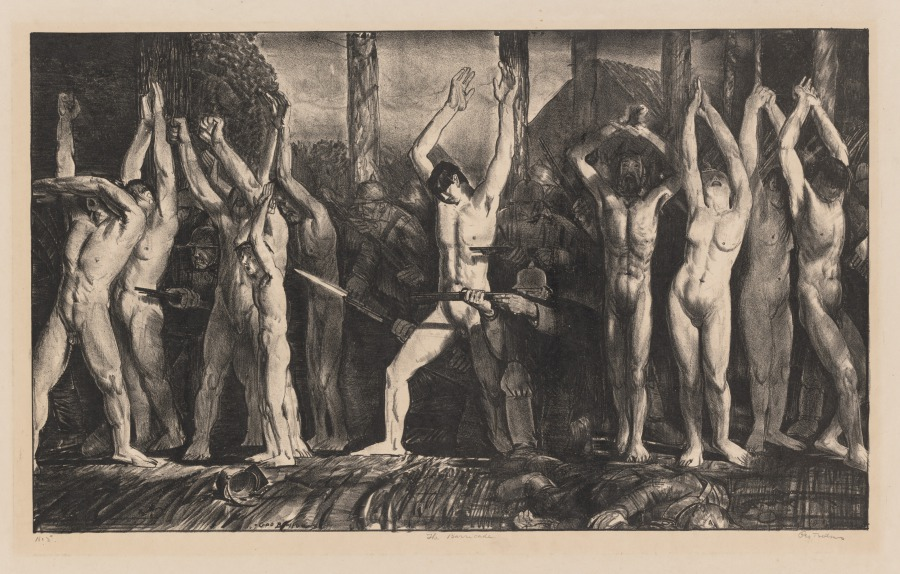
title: The Barricade, First Stone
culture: America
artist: George Bellows (American, 1882–1925)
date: 1918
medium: lithograph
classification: Print